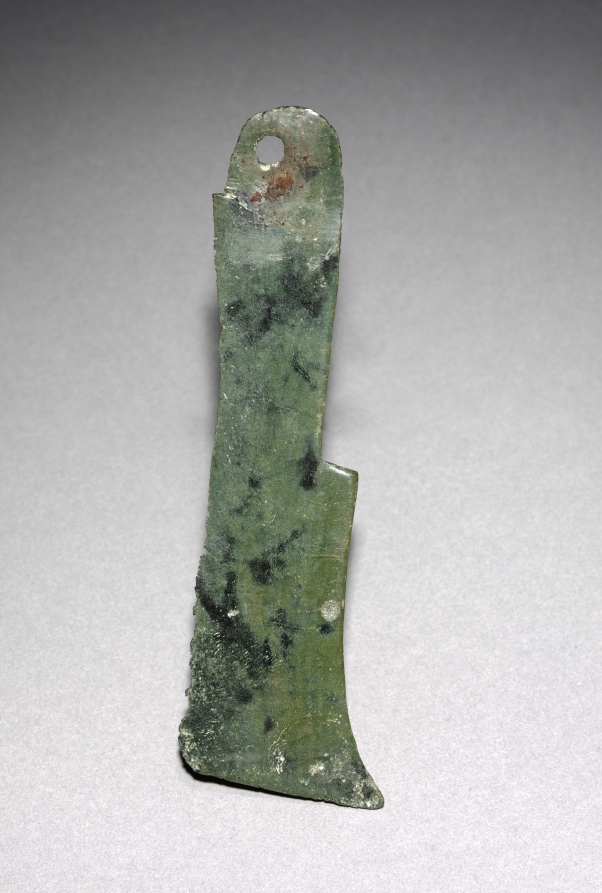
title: Fragment of Razor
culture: Korea, Goryeo dynasty (918–1392)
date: 918–1392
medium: bronze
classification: Metalwork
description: Metal objects such as this razor were used not only as daily accessories, but also as burial goods for commemorating the dead.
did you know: This fragment of a bronze razor may have been part of burial items. A similar example is found in the National Museum of Asian Art, Washington, DC.